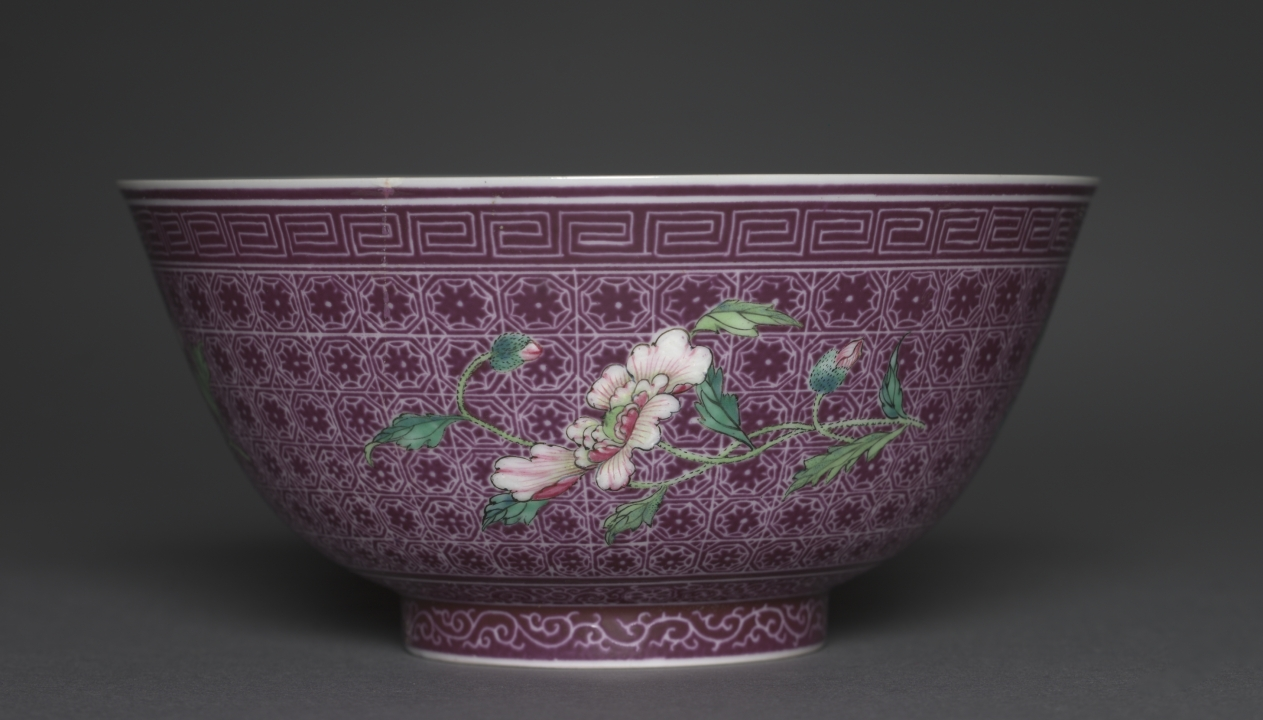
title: Bowl with Peony Sprays on Diaper Ground (exterior); Chrysanthemum Sprays (interior)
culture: China, Jiangxi Province, Jingdezhen, Qing dynasty (1644–1911), Qianlong mark and reign (1736–95)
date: 1736–95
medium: porcelain with famille rose overglaze enamel decoration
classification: Ceramic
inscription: 乾隆年製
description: The production of extraordinarily refined Qing imperial wares such as these could have involved the transportation of undecorated, plain porcelains from the imperial kilns in Jingdezhen, Jiangxi province, to the palace workshops in Beijing, where court painters applied the polychrome enamel decoration. The Qianlong reign mark on the base of the bowl is written with blue enamel over the transparent glaze.